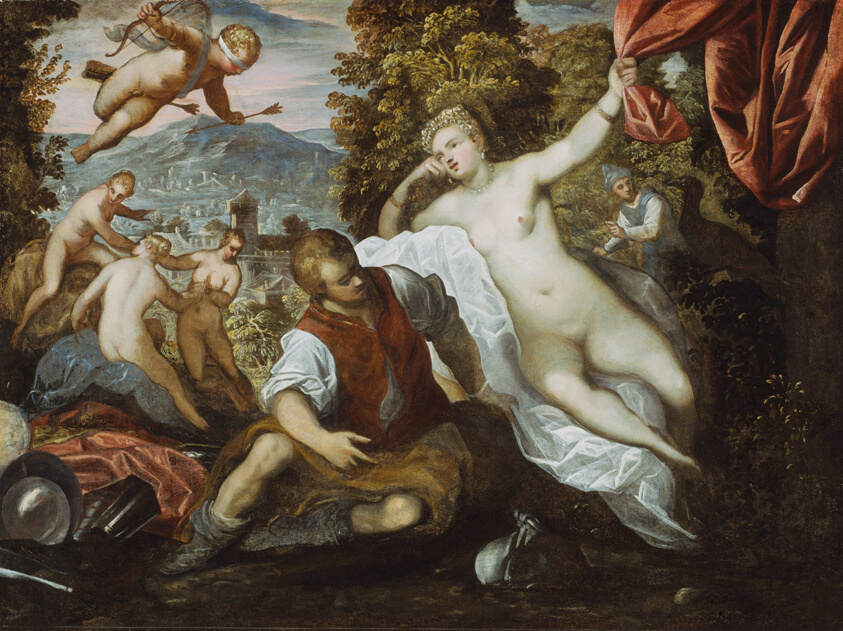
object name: Painting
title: Venus and Mars with Cupid and the Three Graces in a Landscape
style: sixteenth century, 16th Century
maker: Domenico Tintoretto (Italian, 1560–1635)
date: 1590/95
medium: Oil on canvas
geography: Italy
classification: oil on canvas; paint; oil paintings (visual works); Italian; painting; european painting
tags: Century of Progress, Roman, goddesses, gods (deities), mythical, mythological figures, mythology, cupids, Venus, man, woman, women, children, landscape, landscapes, war, love, beauty, nudes, armor, weapons, textile, fabric, trees, nature, foliage, world's fairs, Chicago World's Fairs